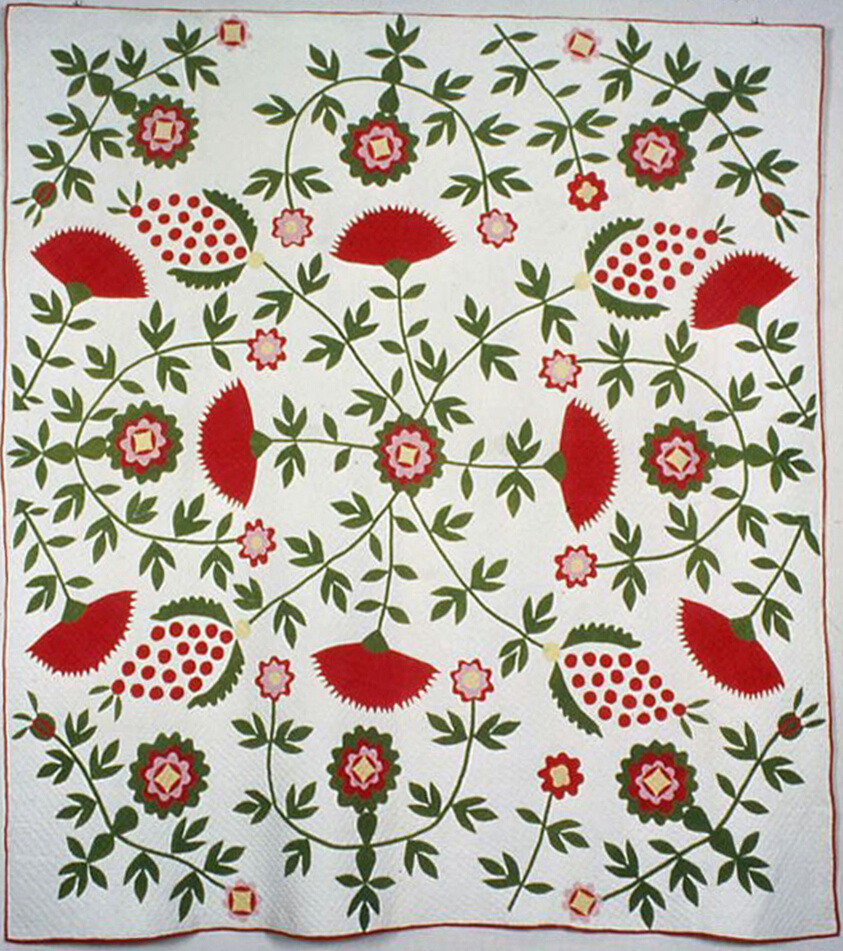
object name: Textile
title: Bedcover (Cockscomb, Rose Tree and Pineapple Quilt)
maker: United States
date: c. 1840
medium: Cotton, plain weave; appliquéd with cotton, plain weave, printed; backed with cotton, plain weave; quilted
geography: United States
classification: textile; needlework - quilt; needlework (visual works)